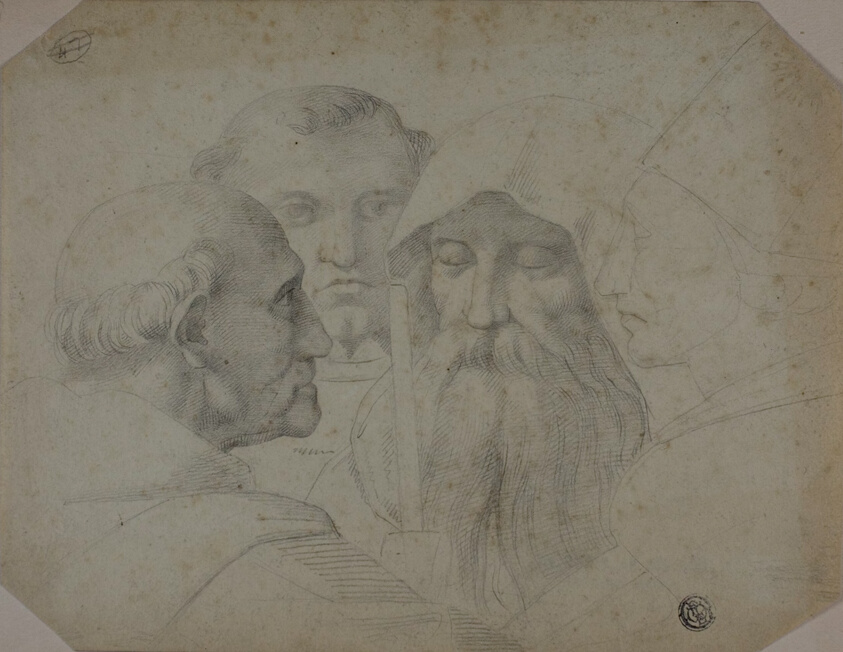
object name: Drawing and Watercolor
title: Four Men in Conversation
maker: After Raffaello Sanzio, called Raphael; Italian, 1483-1520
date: 18th/19th century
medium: Black chalk, with graphite, on pale green wove paper, tipped on to cream wove paper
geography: Italy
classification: chalk; drawings (visual works); prints and drawing